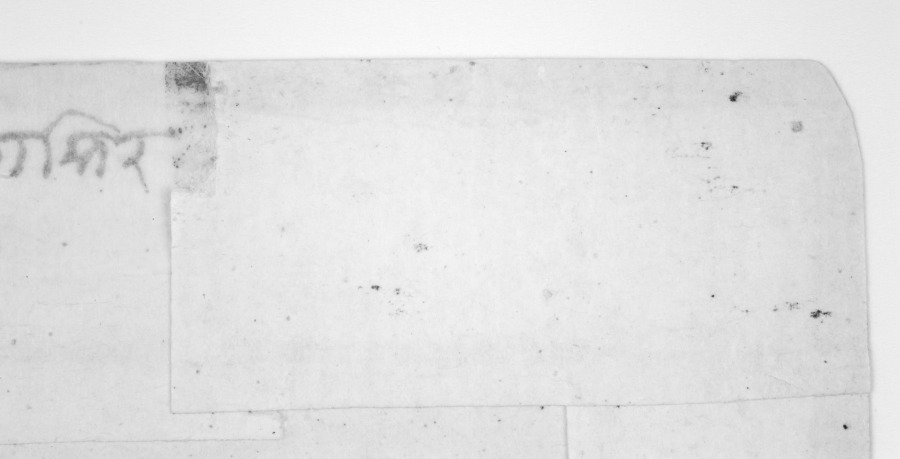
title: The Heroine Who Waits Anxiously for Her Absent Lover: Utka Nayika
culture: Northern India, Pahari kingdoms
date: c. 1734–50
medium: Gum tempera and gold on paper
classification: Painting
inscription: Verso: light drawing in brown ink of a standing lady; traces of part of a purple stamp with the word "Bikaner" visible.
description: The Sanskrit term nayika is typically translated as heroine, but more precisely a nayika is an idealized woman associated with various aspects of love, embodying a wide range of emotional and psychological states. Numerous literary works composed in India since at least the first century describe and categorize different types of nayikas. This utka nayika stands in glowing orange and gold in the night, waiting for her lover to arrive. Her demeanor is quiet and resolved. Her gesture indicates wonder, possibly that the clouds may be passing, and the moon may emerge to brighten the scene. She may also be astonished at her own perseverance and how she no longer feels the fear and agitation of the darkness and the solitude.